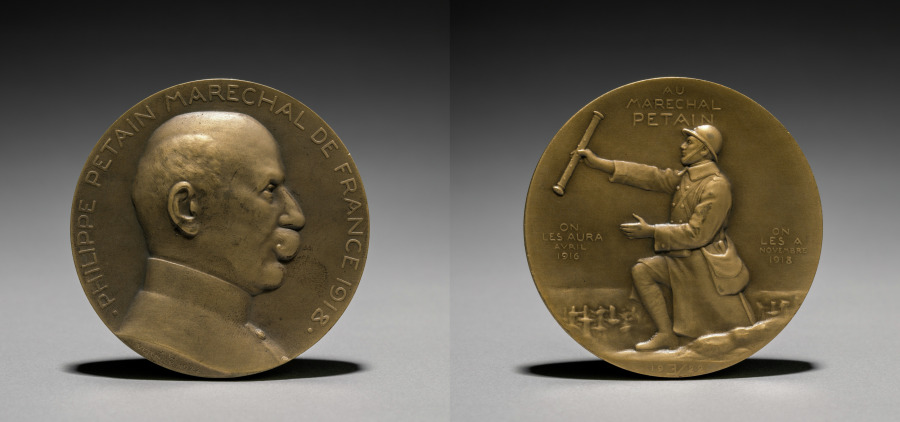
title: Petain Medal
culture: France, early 20th century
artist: Èmile Séraphin Vernier (French, 1852–1927)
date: 1922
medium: bronze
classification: Metalwork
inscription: obverse - "Philippe Petain Marechal de France, 1918." reverse - "AU MARECHAL PETAIN. ON LES AURA AVRIL 1916. ON LES A NOVEMBRE 1918."